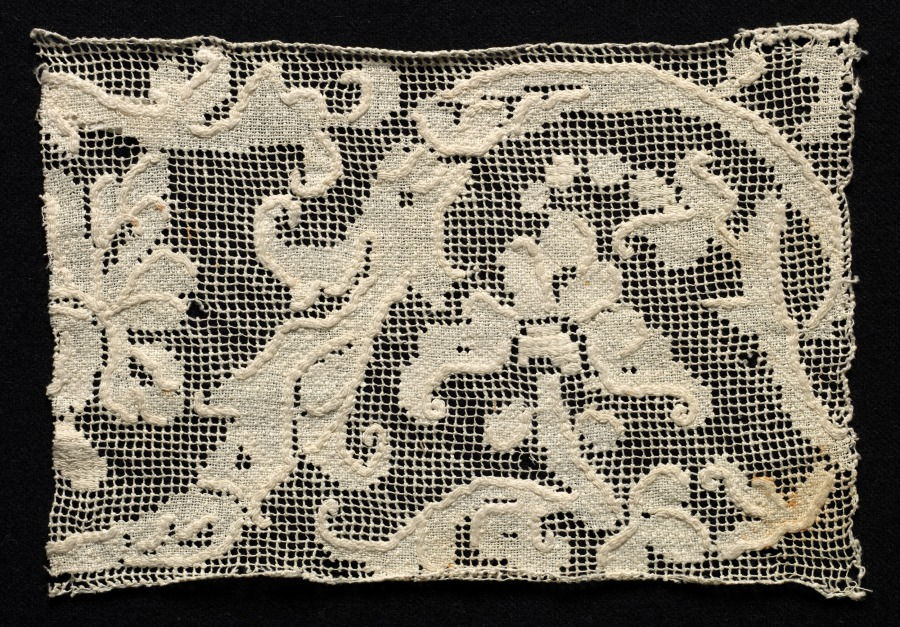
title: Fragment (of a Band?) with Floral Pattern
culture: Italy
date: 1500s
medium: Bleached linen (est.): needle lace, filet/lacis (knotted ground and darned in two directions)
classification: Lace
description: Lace was often used in large quantities to produce opulent effects of light and contrasting texture. Bands of this width may have originally adorned a woman’s skirt or petticoat, heightening the design and overall impact with its rich floral pattern.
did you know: This small fragment was apparently cut from a much larger piece, perhaps originally decorating a woman’s dress.